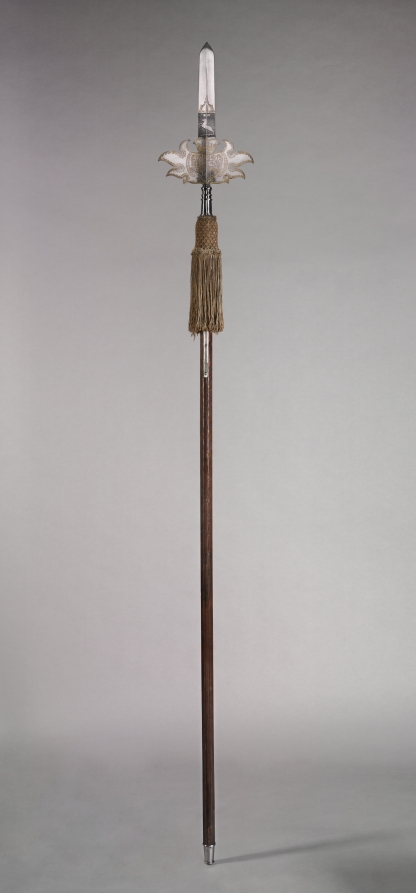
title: Parade Partisan (from the Bodyguard of August Wilhelm, Duke of Brunswick- Wolfenbüttel [1662-1731])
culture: Germany, 18th century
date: 1718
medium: blued, etched and gilded steel, wooden haft with orginal steel base spike, silk tassel with alternating blue and gold bands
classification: Arms and Armor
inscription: AUGUST WILHELM/DG DUX BRUNS EA LUNEB; 1718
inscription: HAW II; PARTA TVERI; 1718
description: The halberd and partisan are hafted weapons highly favored by European infantries of the 1500s and 1600s for their great versatility and deadly effect. From about 1550 on, these weapons underwent significant changes as they gradually became more ornamental. The large flat surfaces of the blades lent themselves to engraving, etching, gilding, and other forms of decoration. They also provided the perfect location for the coats of arms of princely or noble families. For this reason, hafted weapons became the favored parade weapons of palace guards and splendidly outfitted special regiments of princely bodyguards. These examples, made for the German dukes of Brunswick at Schloss Blankenburg, still have their silk tassels in their original colors of blue and yellow.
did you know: Partisans were popular weapons before firearms.